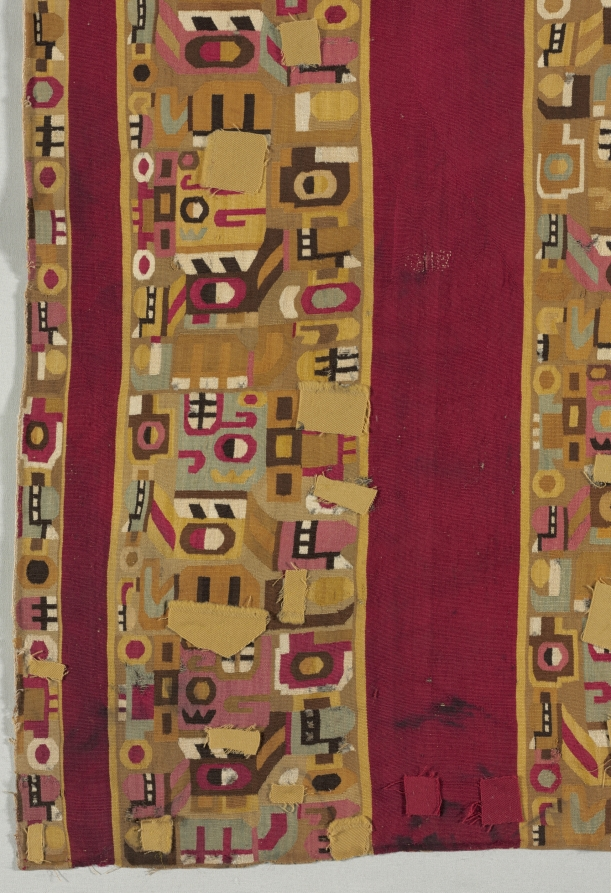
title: Tunic with Sacrificer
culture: South America, Peru, Central Andes, Middle Horizon, Wari people, 7th-11th century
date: 600–1000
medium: camelid-fiber, cotton; tapestry weave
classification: Textile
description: An extremely abstract supernatural sacrifice repeats in different colors and orientations across the body of this tunic, which was shortened on one side in antiquity. Look for the toothy black-and-white mouth in the sacrificer's upward-gazing head; other facial features include a button nose and a vertically divided eye. The figure holds the L-shaped haft of an axe behind its back and, at the front of its body, a short staff with a severed, upside-down human head on the top.